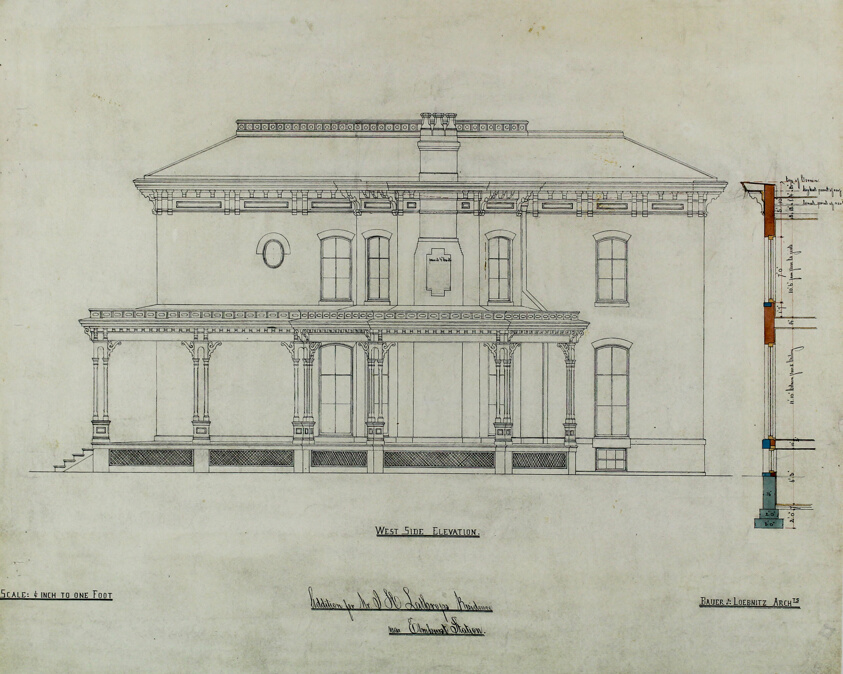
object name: Architectural Drawing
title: Joseph H. Lathrop House Addition, Elmhurst, Illinois, Elevation and Section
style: 19th century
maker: Bauer & Loebnitz; American, 1866–1874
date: c. 1870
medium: Black and colored inks, graphite, and watercolor on paper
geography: Elmhurst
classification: architectural working drawing; architectural drawing; architecture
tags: houses, architecture, illinois